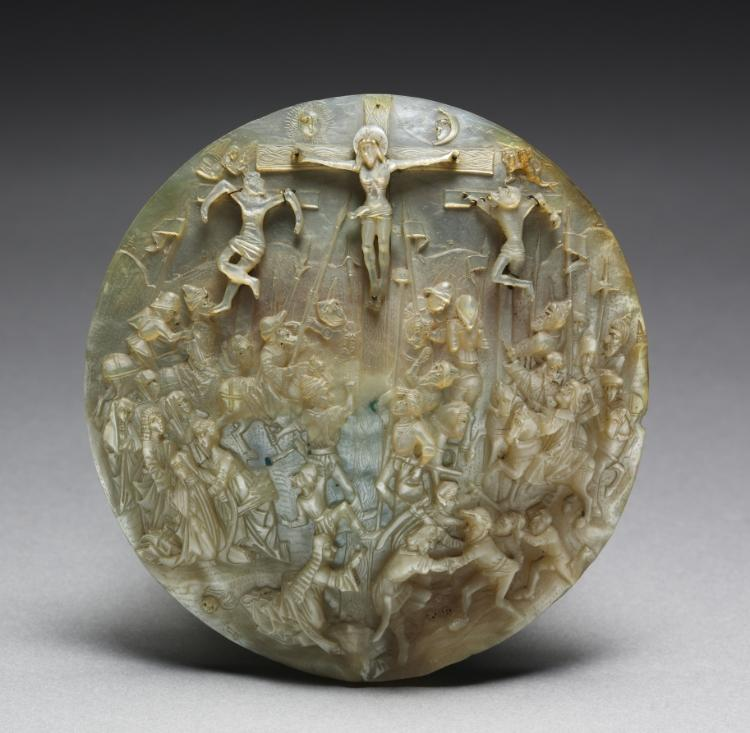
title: Calvary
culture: Germany, Middle Rhine?, 15th century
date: c. 1450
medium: mother-of-pearl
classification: Sculpture